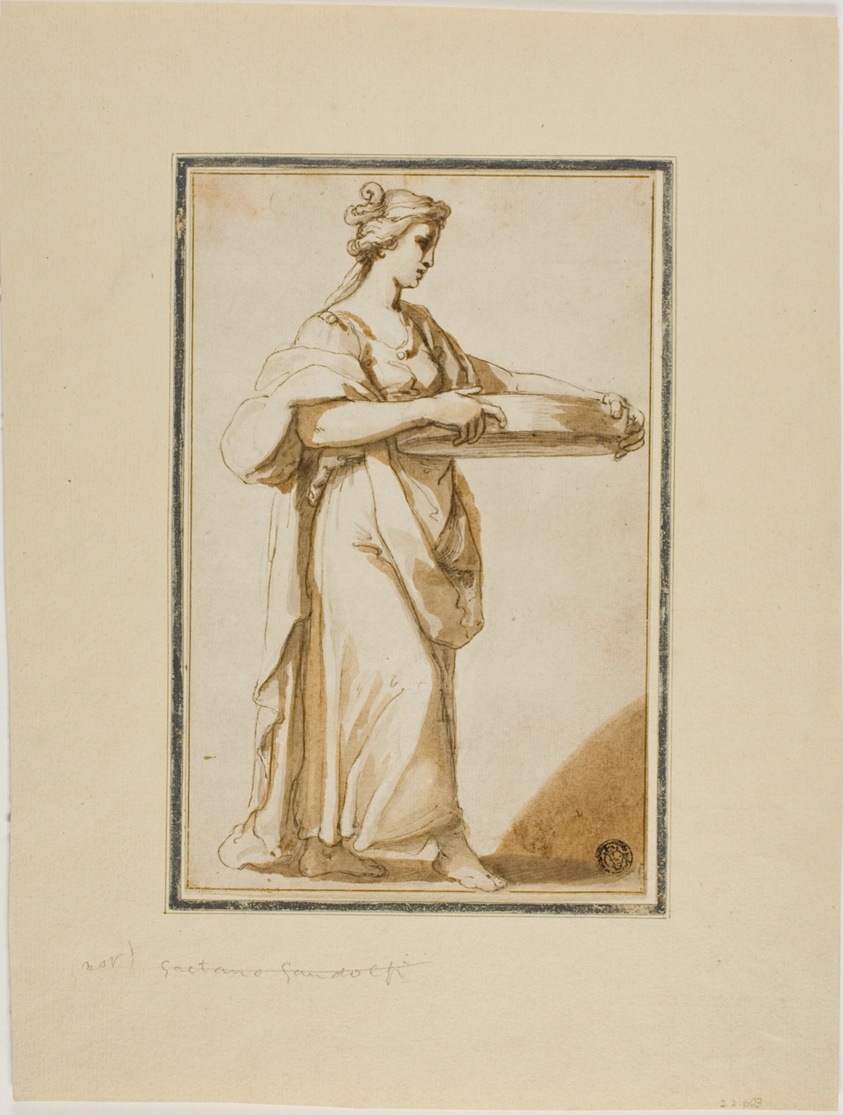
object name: Drawing and Watercolor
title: Vestal Virgin Tuccia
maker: Gaetano Gandolfi (Italian, 1734-1802); or the circle of Taddeo Zuccaro (Italian, (1529-1566)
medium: Pen and brown, with brush and brown wash, over traces of black chalk, on ivory laid paper, laid down on ivory wove paper and tipped onto cream laid paper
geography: Italy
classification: pen and ink drawings; paper; drawings (visual works); prints and drawing